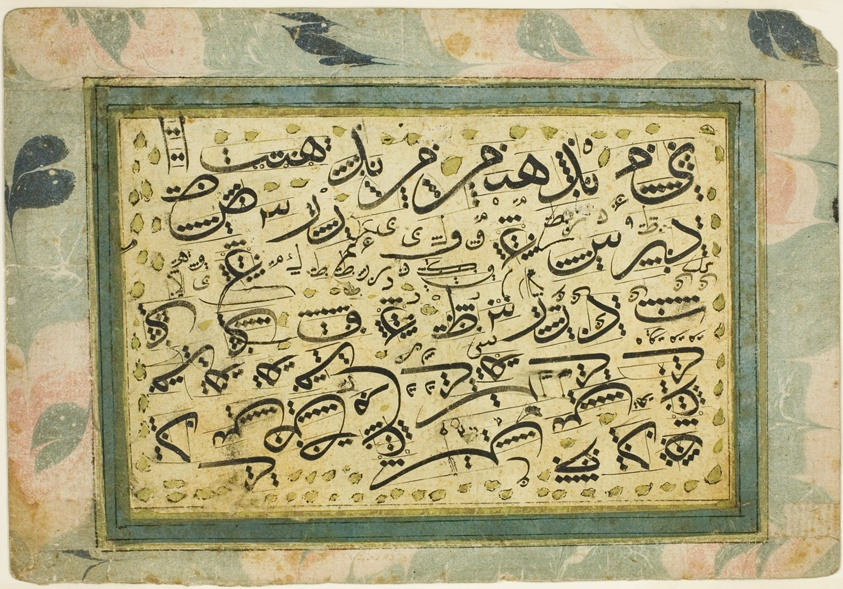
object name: Drawing and Watercolor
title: Calligraphic Exercise Showing Measurements of Individual Letters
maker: Turkey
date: 18th/19th century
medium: Ink and colors on paper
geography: Turkey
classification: calligraphy; painting; asian art